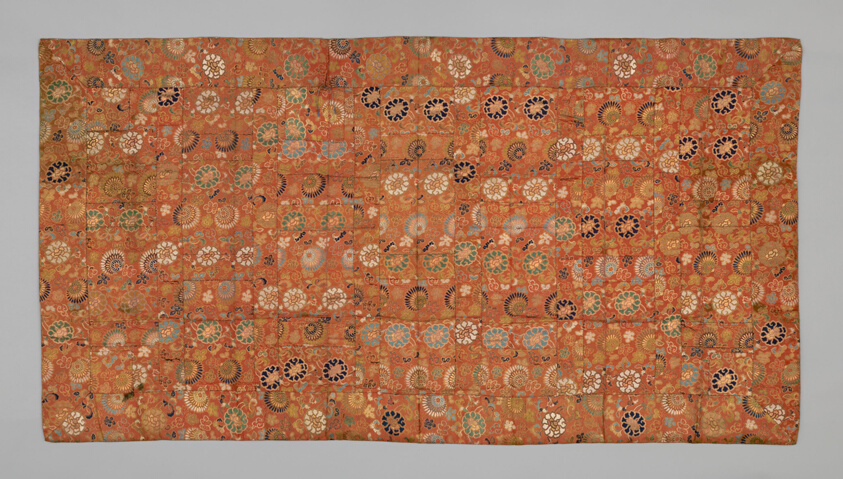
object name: Textile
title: Kesa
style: edo (japanese period)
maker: Japan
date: late Edo period (1789–1868), late 18th/early 19th century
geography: Japan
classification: textile; costume; liturgical - buddhist; weaving